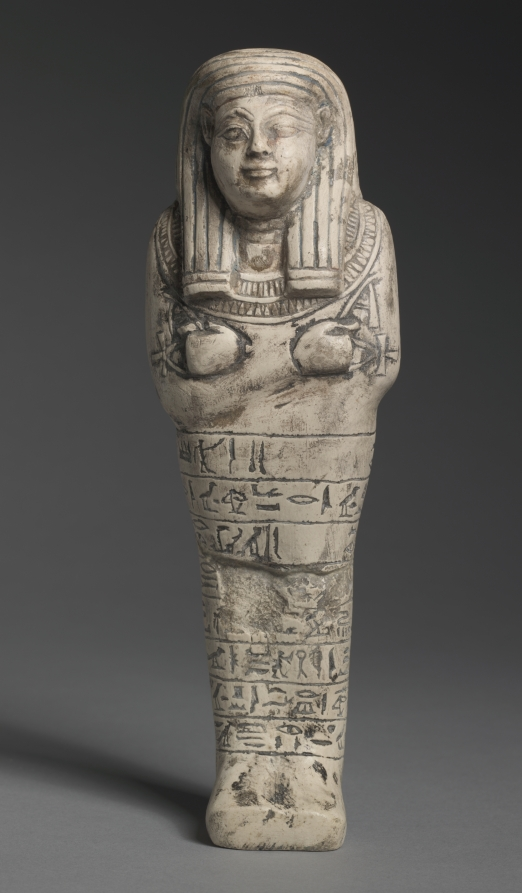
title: Shawabty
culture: Egypt, New Kingdom (1540–1069 BCE)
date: 1336–1295 BCE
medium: painted limestone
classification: Funerary Equipment